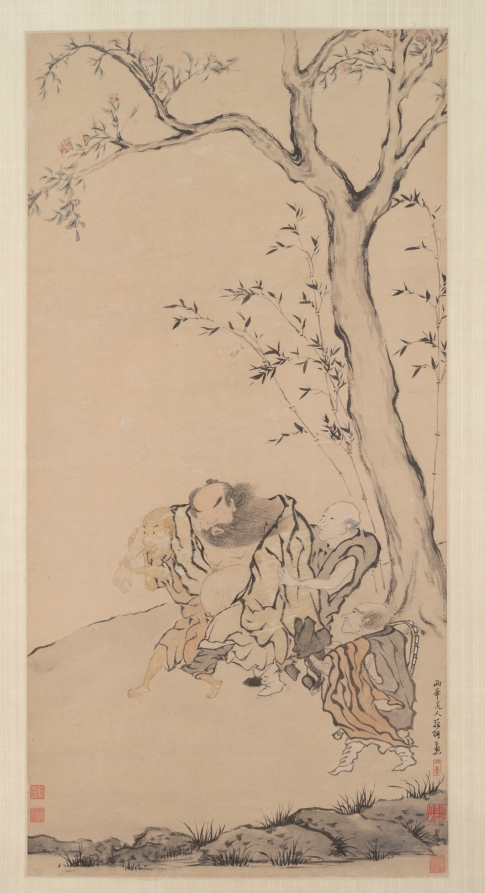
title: Zhong Kui Supported by Ghosts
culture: China, Qing dynasty (1644–1911)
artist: Luo Ping (Chinese, 1733–1799)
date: 1700s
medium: hanging scroll; ink and light color on paper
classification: Painting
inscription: 兩峰道人羅聘畫 【印】 兩峰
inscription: 4 additional seals: 3 of Dai Zhi 戴植 (19th c.); 1 of Ren Bonian 任伯年 [Ren Yi 任頤] (1840–1895)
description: In popular belief, Zhong Kui is a powerful guard against evil spirits, particularly on New Year’s Day and at the Double-Fifth Festival, on the fifth day of the fifth lunar month, when his image is displayed in households to prevent diseases and other misfortunes.